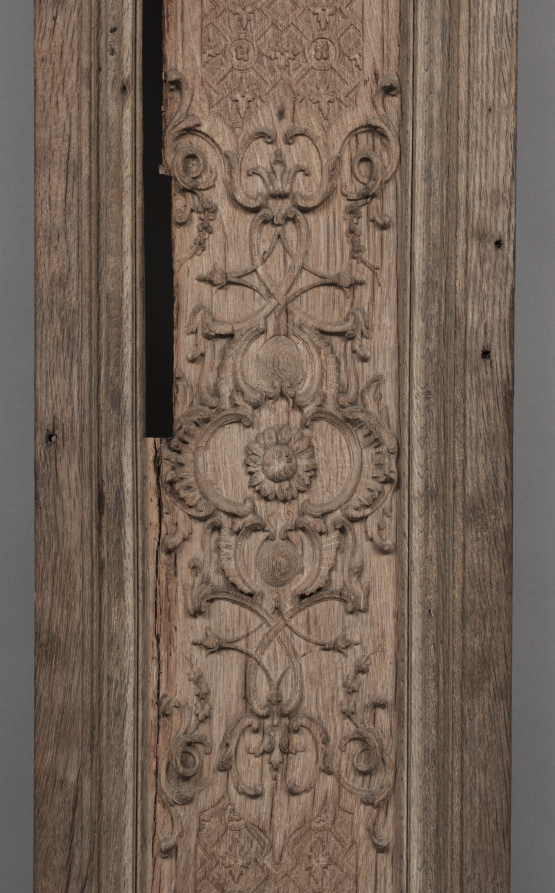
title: Panel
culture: France, Regency Period, 18th Century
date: 1715–1723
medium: wood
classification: Furniture and woodwork